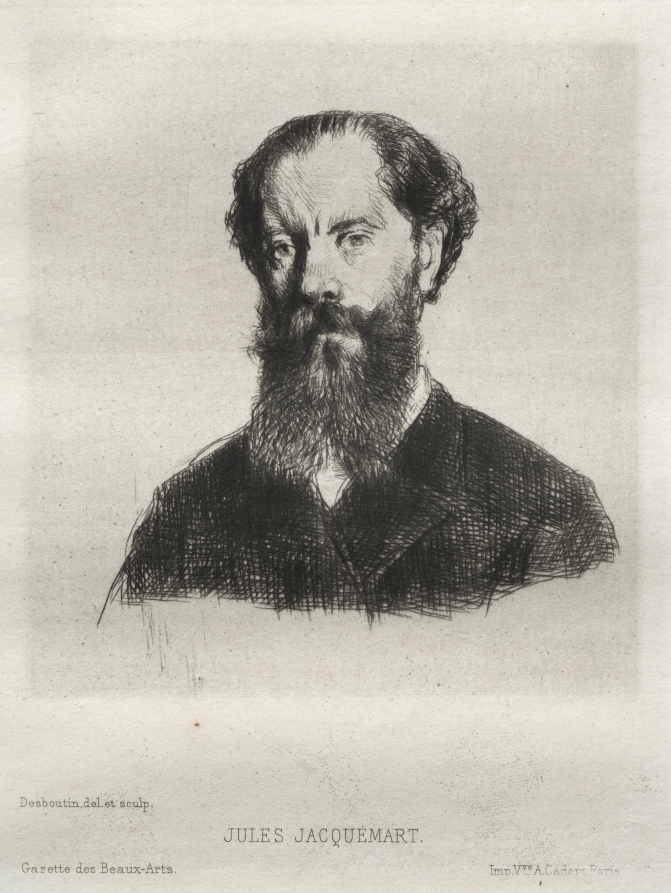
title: Jules Jacquemart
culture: France, late 19th-early 20th century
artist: Marcellin Gilbert Desboutin (French, 1823–1902)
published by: Gazette des Beaux-Arts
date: 1876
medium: etching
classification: Print